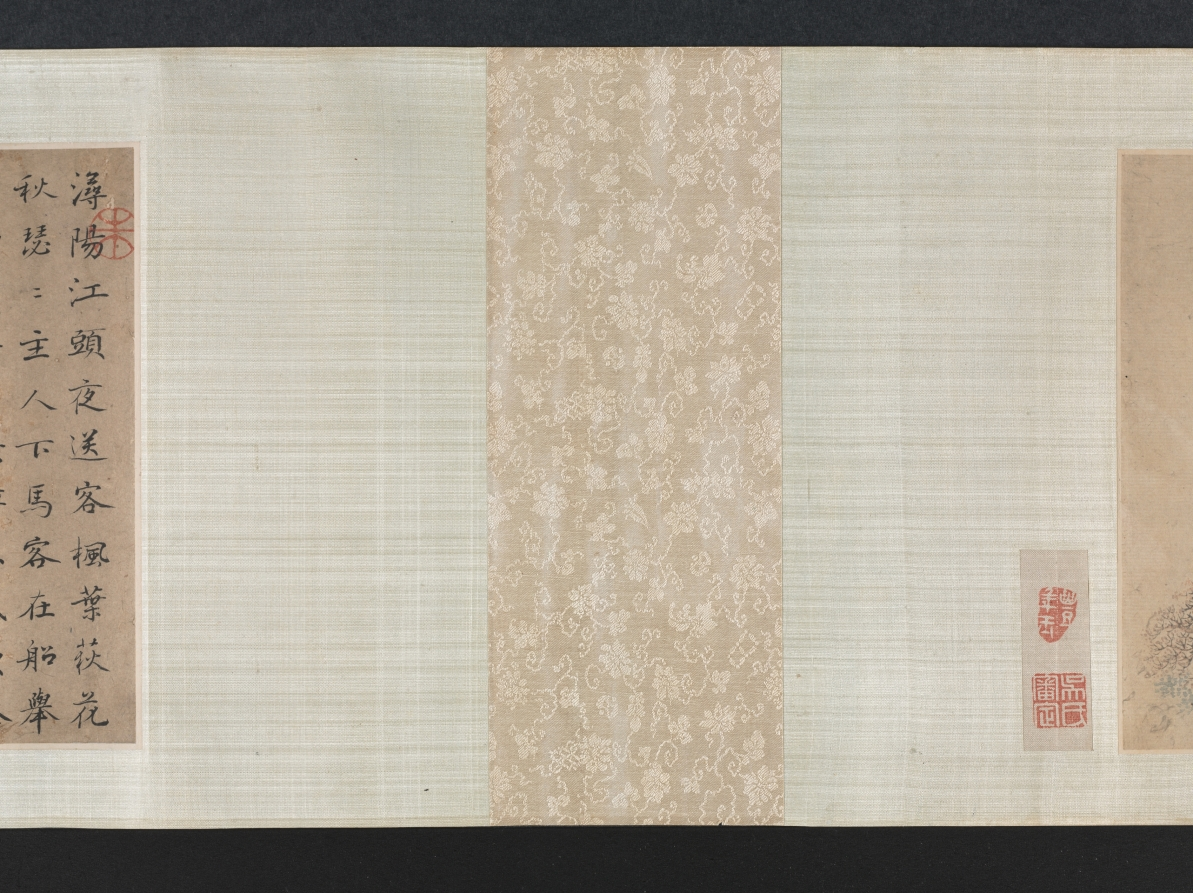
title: Saying Farewell at Xunyang (Song of the Pipa)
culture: China, Ming dynasty (1368–1644)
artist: Wen Boren (Chinese, 1502–1575)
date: 1500s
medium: handscroll, ink and color on paper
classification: Painting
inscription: "潯陽送客圖" 五峰山人文伯仁寫于停雲館中 [印] 文伯仁; 五峰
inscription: 2 colophons and 9 additional seals: 1 transcription of "Pipa xing 琵琶行” (Song of Pipa) and 3 seals of Zhu Yizun 朱彜尊 (1629-1709); 2 seals of Wu Rongguang 吳榮光 (1773-1843); 1 colophon, dated 1826, and 3 seals of Wu Xijia 吳錫嘉 (mid-1700s)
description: This handscroll depicts The Song of the Pipa, a poem by Bai Juyi 白居易 (772–846) written after the poet’s encounter with a pipa player on the Yangzi River. Expelled from her home city when her beauty and fame had faded, she played for the poet at night. Her musical performance and tragic life story resonated with Bai Juyi, who had just been demoted and exiled from life at court himself. The hazy, vast view and pale color tonalities of this painting illustrate these feelings of endless sadness, having lost one’s sense of purpose in life.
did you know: Wen Boren depicted the chilly autumn water with a fishnet pattern.